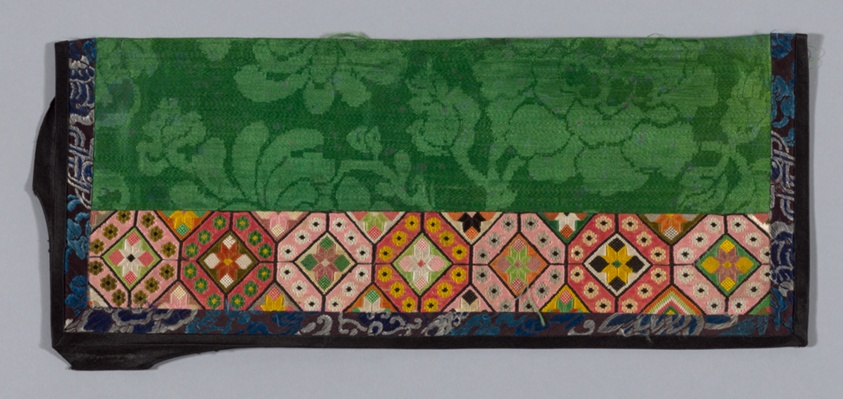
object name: Costume and Accessories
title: Trouser Band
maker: Han-Chinese (China)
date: Qing dynasty (1644–1911), 1875/1900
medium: Forty-four pairs and eight odd pieces of embroidered sleeve, ankle bands, etc. on gauze.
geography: China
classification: costume - embroidery; embroidery; costume